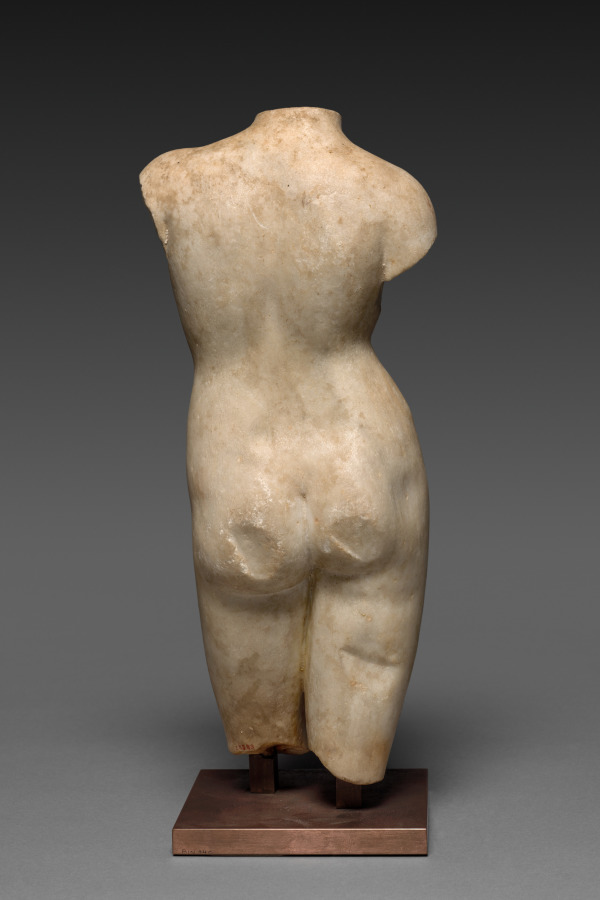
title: Torso of a Woman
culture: Italy, Roman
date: 100 BCE–400 CE, or modern, before 1927?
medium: marble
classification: Sculpture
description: Even without her head, limbs, or additional attributes, the nudity of this female statuette connects her to Aphrodite, goddess of love, or Venus, her Roman parallel. Female nudity was first realized in large scale in the mid-300s BC by the famous Athenian artist Praxiteles (395–330 BC), whose sculpture of Aphrodite was prominently displayed in a shrine in the city of Knidos (in present-day Turkey). For centuries thereafter, the female nude became a great favorite for Greek and Roman artists. The tradition continued into modern times, leading some to question the ancient origins of this sculpture.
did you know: The nudity of this female statuette connects her to Aphrodite or Venus, goddess of love.